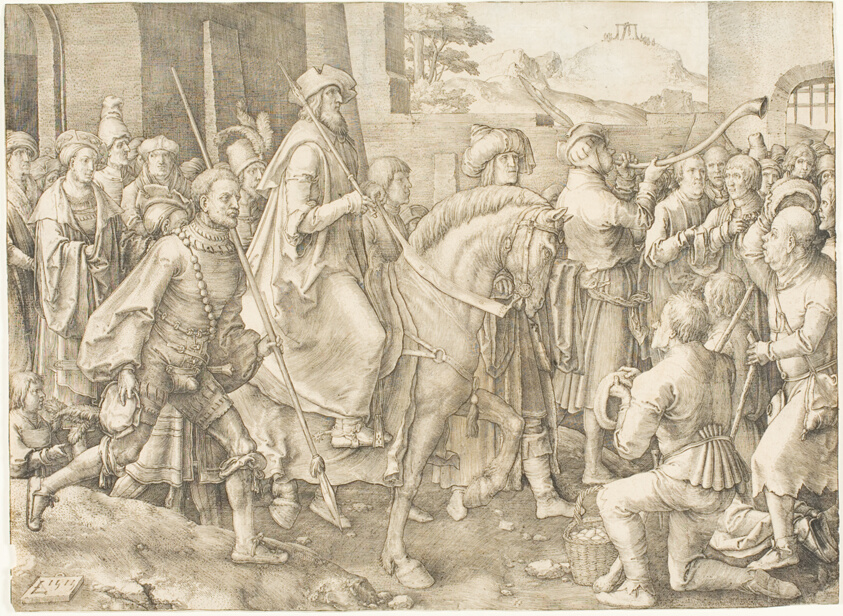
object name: Print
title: The Triumph of Mordecai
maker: Lucas van Leyden (Netherlandish, c. 1494-1533)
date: 1515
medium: Engraving in black on cream laid paper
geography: Netherlands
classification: engraving; print; prints and drawing